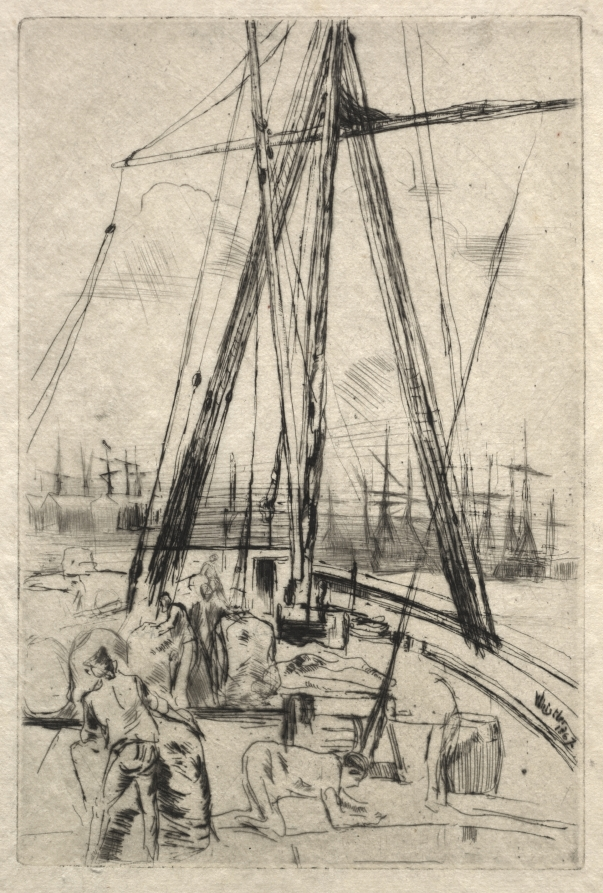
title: Shipping at Liverpool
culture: America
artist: James McNeill Whistler (American, 1834–1903)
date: 1867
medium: etching and drypoint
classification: Print